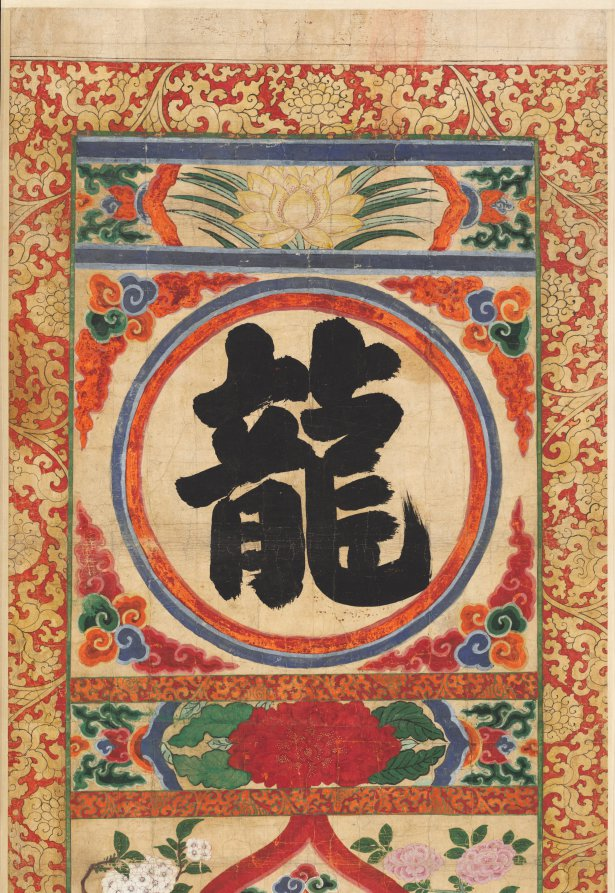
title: Painted Panel of Character "Dragon"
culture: Korea, Joseon dynasty (1392–1910)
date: early 1900s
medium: hanging scroll, ink and color on paper; unmounted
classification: Painting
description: This set of four colorful hanging scrolls may have been used in an outdoor Buddhist ritual to evoke heavenly blessings. Each hanging scroll bears four different characters: tiger, dragon, whistle, and recite. Traditionally, tiger and dragon belong to the four directional guards, respectively west and east.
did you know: This set of four colorful hanging scrolls may have been used in an outdoor Buddhist ritual to evoke heavenly blessings.